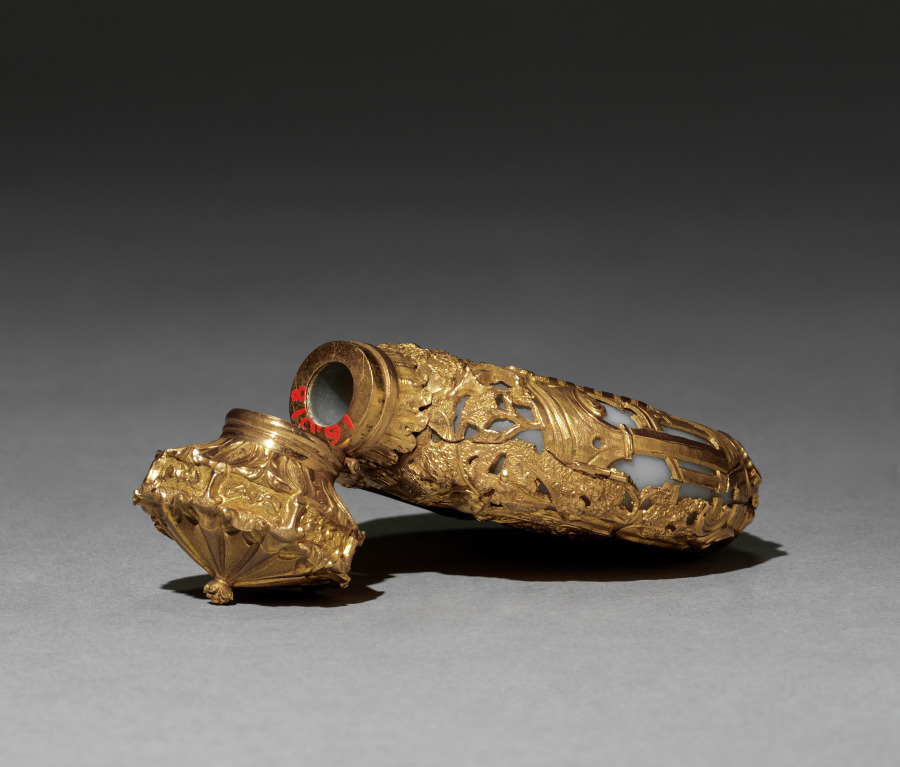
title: Scent Bottle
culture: Germany (?)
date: 1800s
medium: blue-gray opaline glass mounted in gold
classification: Miscellaneous